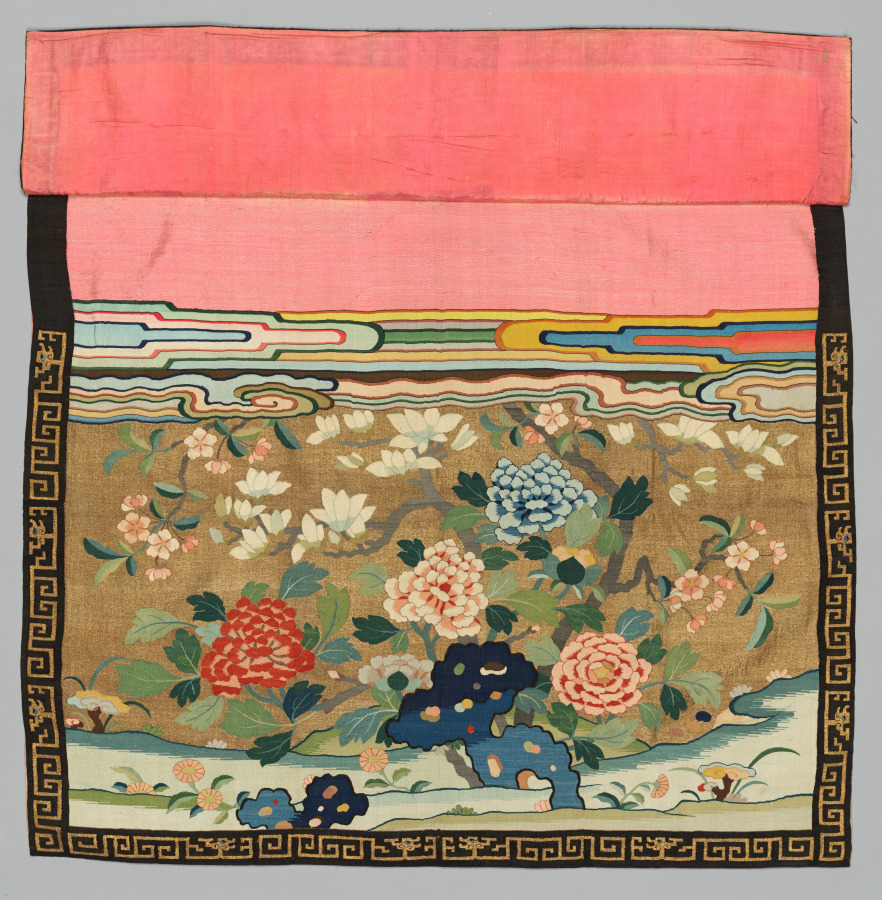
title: Table Hanging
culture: China, Qing dynasty (1644-1911)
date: 1700s–1800s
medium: Silk and gold filé; tapestry weave, slit joins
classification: Textile